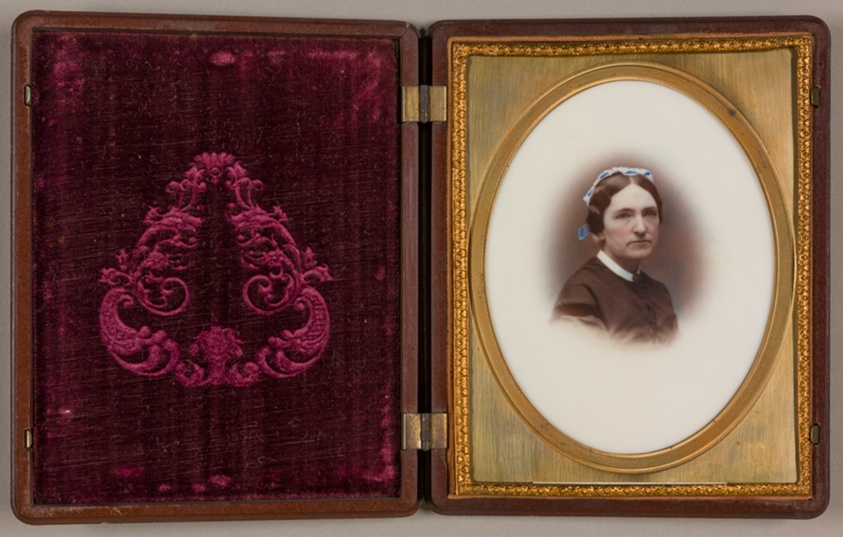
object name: Photograph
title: Untitled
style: 19th century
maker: Artist unknown; 19th century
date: 19th century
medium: Albumen on porcelain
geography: Unknown Place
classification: albumen silver print; photographic process; photography; photograph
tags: portraits, portraits: female subject, photography, formal portraits